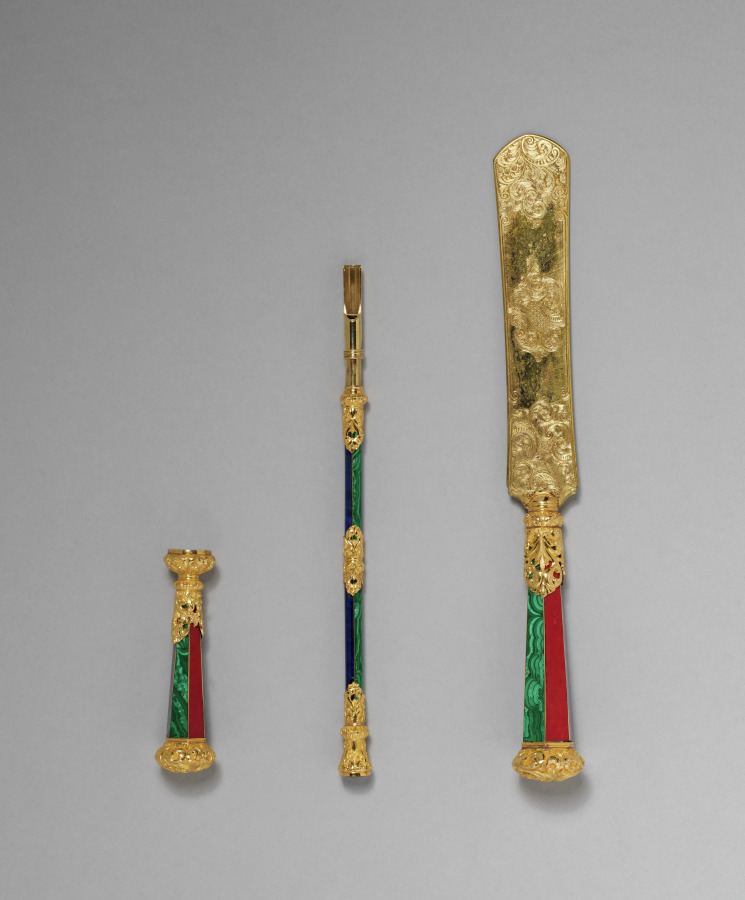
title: Writing Set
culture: England, mid-19th century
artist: John Hamilton Mortimer (British, 1740–1779)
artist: and Paul Storr (British, 1771–1844)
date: c. 1830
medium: hardstones including lapis lazuli, malachite, carnelian, agate, gold; original fitted velvet-lined case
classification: Miscellaneous